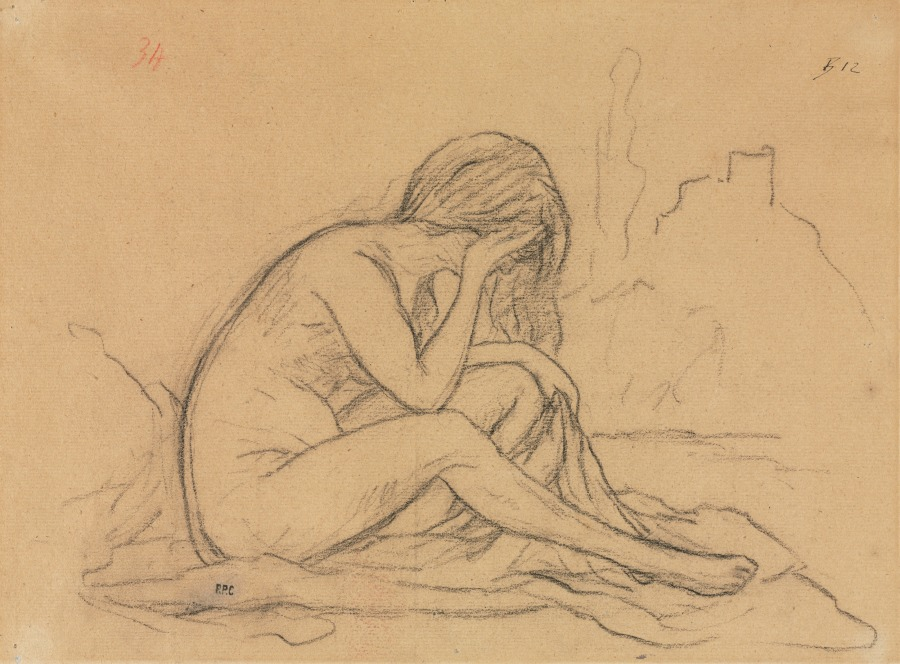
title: Study of a Female Nude (possibly for an unrealized allegorical painting) (recto); Studies of Drapery and Study of a Landscape (verso)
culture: France, 19th century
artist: Pierre Puvis de Chavannes (French, 1824–1898)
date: 1800s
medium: black chalk stumped with heightening of white chalk on brown paper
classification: Drawing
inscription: inscribed upper left center in red pencil: 34; inscribed upper right in black ink: B12